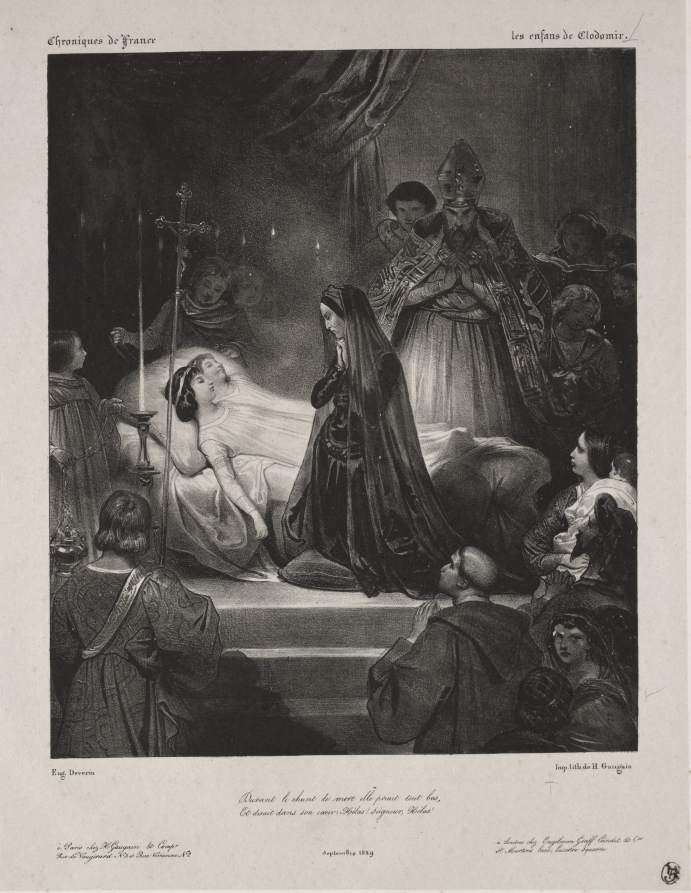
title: Chronicles of France: The Children of Clodomir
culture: France, 19th century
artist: Eugène François Marie Joseph Devéria (French, 1805–1865)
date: 1829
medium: lithograph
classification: Print